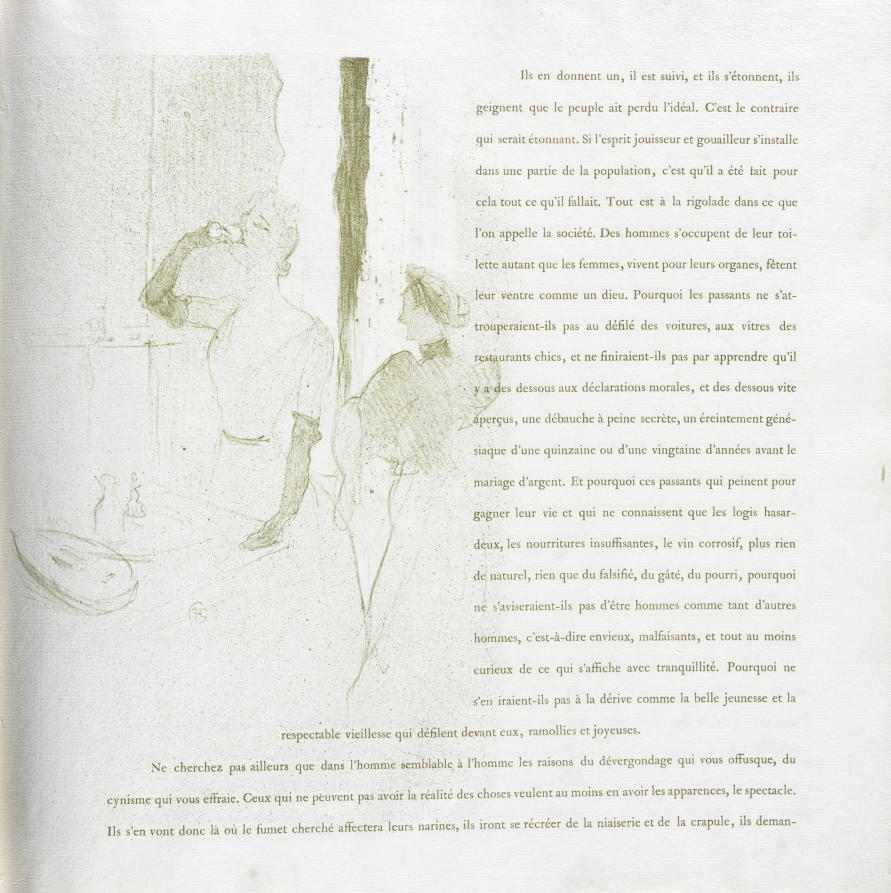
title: Yvette Guilbert-French Series: No. 14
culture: France, 19th century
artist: Henri de Toulouse-Lautrec (French, 1864–1901)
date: 1894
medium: lithograph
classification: Bound Volume